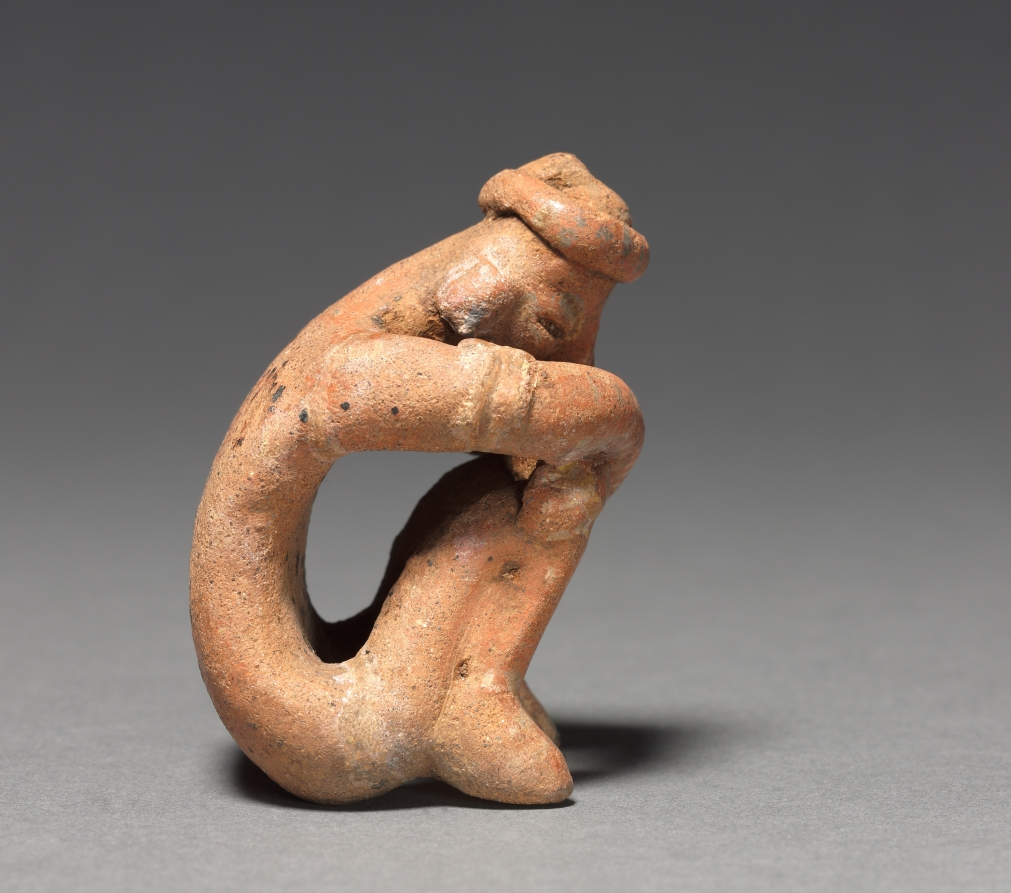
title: Seated Male Figurine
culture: Mesoamerica, Veracruz, Remojadas Style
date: 500–900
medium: ceramic, pigment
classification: Sculpture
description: Clay figurines were the earliest and most common art form in Mexico and other countries in the ancient Mesoamerican (Middle American) culture region. Made first by hand and later with molds, most figurines belong to the traditions of commoners, such as farmers, rather than those of elites.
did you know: Clay figurines were the earliest, most common art form in the ancient Mesoamerican culture region.